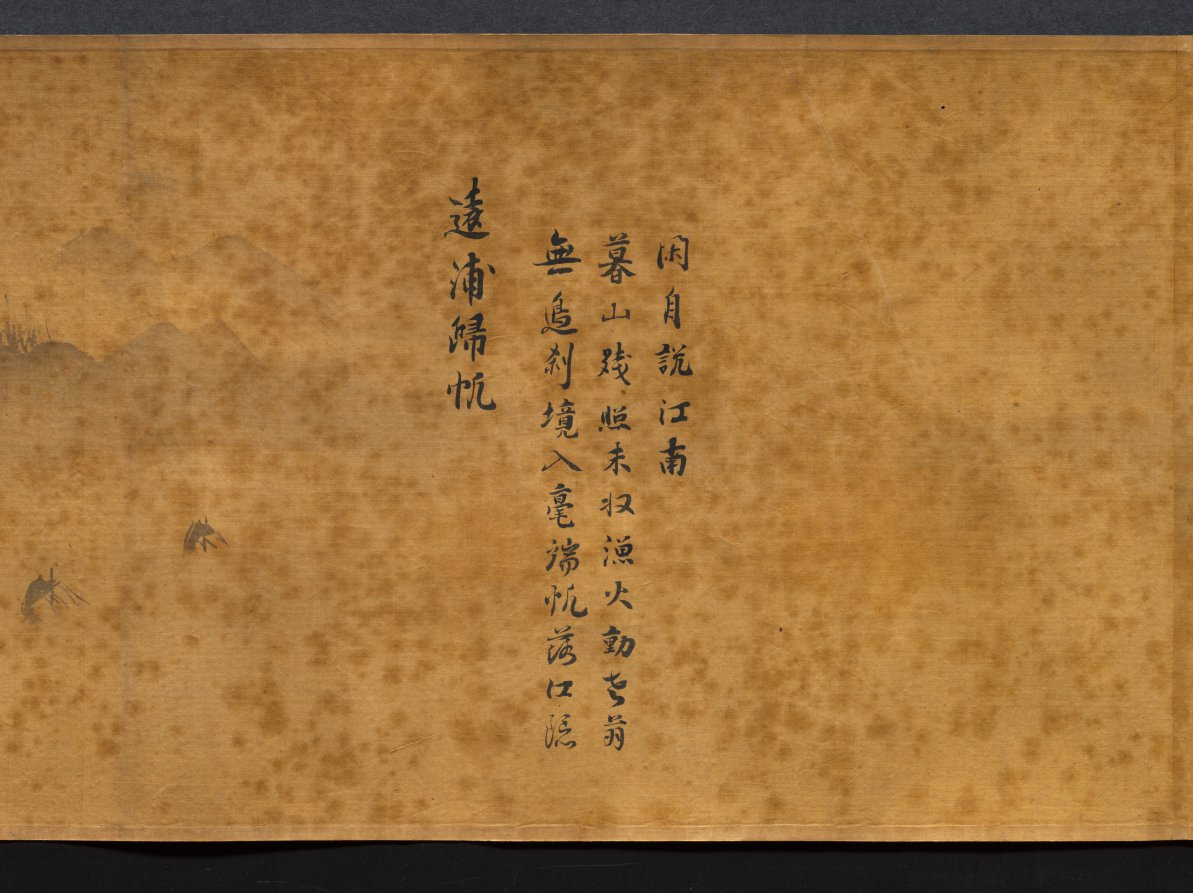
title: Eight Views of Xiao-Xiang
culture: Japan, Edo period (1615–1868)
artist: Kano Tan’yū (Japanese, 1602–1674)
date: 1615–1868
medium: handscroll; ink on silk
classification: Painting